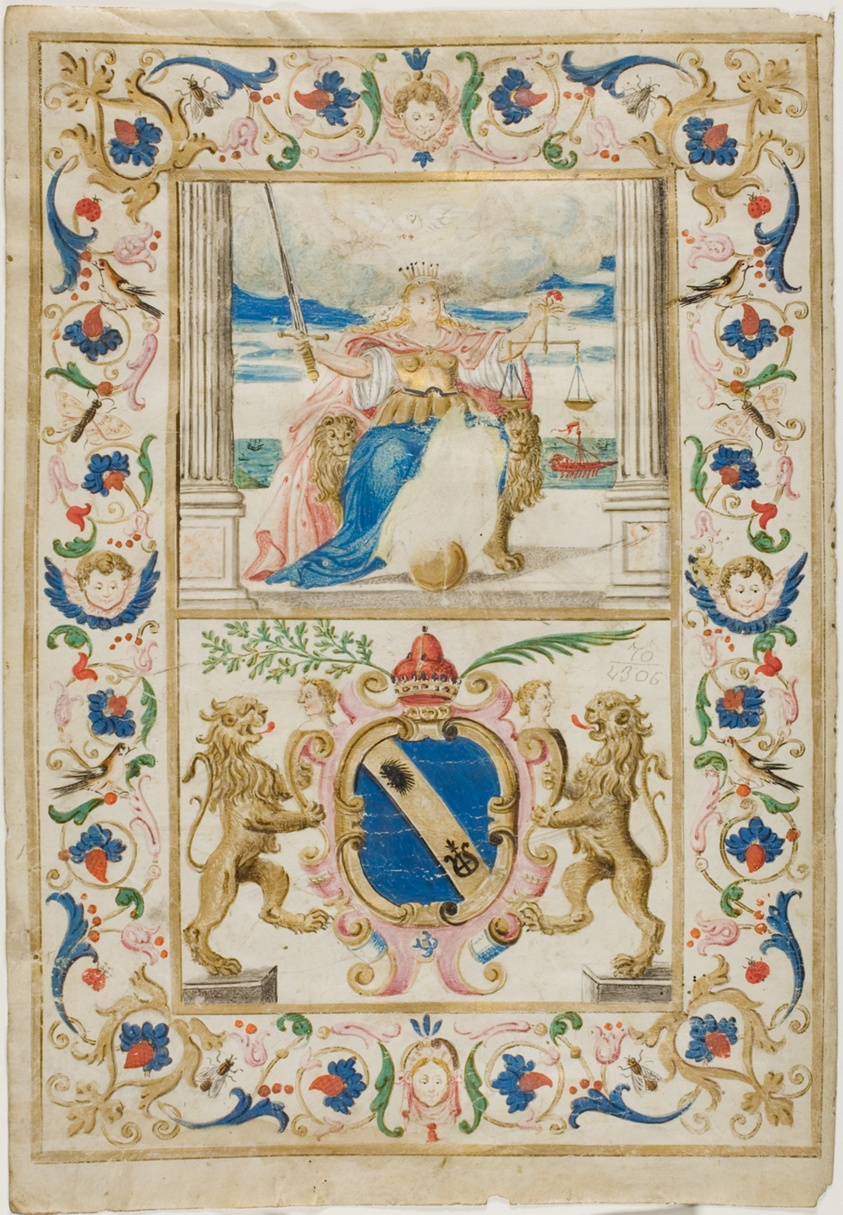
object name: Drawing and Watercolor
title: Figure of Justice and Shield with Lions Rampant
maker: European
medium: Manuscript cutting with gouache and gold paint, gold leaf, and pen and black and brown ink on vellum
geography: Europe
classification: manuscript; drawings (visual works); prints and drawing